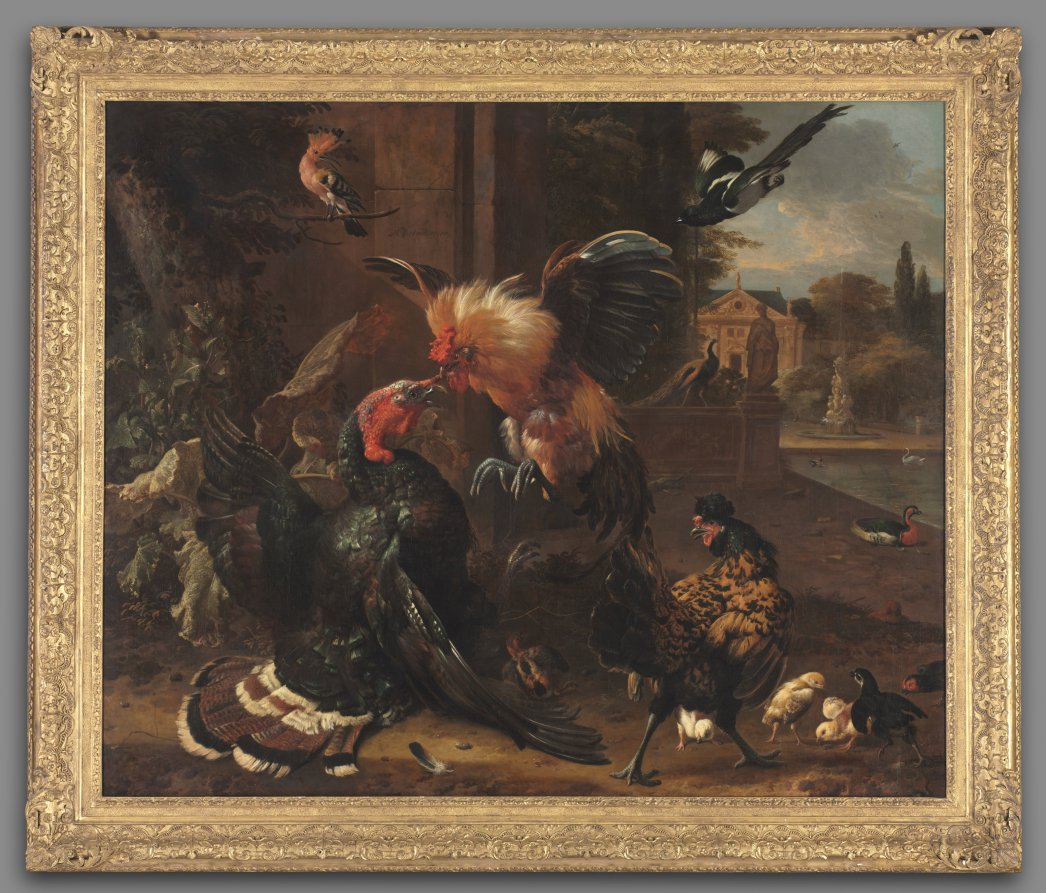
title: A Rooster and Turkey Fighting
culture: Netherlands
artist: Melchior de Hondecoeter (Dutch, 1636–1695)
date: c. 1680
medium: oil on canvas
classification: Painting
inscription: signed upper center: M C Hondecoeter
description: One of the most fashionable artists of his time, Hondecoeter specialized in paintings of domestic and exotic birds, and other animals. Here the composition is enlivened by the swirl and excitement of the fighting rooster and turkey, set in a garden with classical architecture. A large picture like this must have been placed high over a fireplace in a rich Amsterdam house.